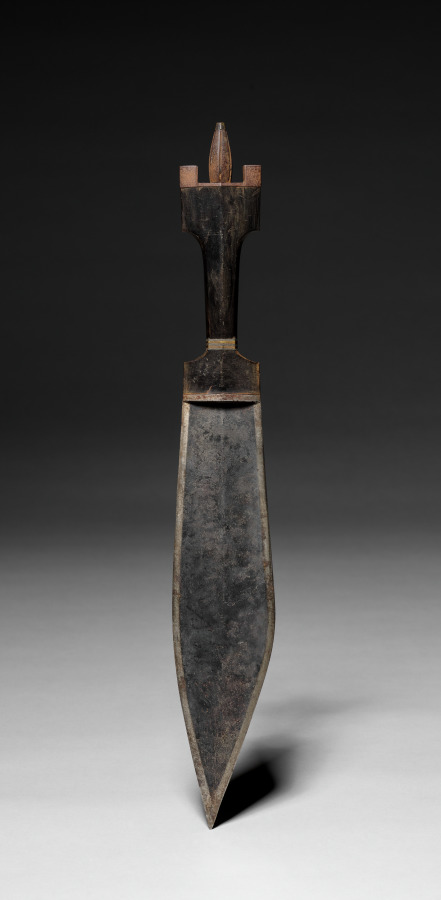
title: Knife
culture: Africa, East Africa, Somalia, unknown maker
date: early 1900s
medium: Iron and horn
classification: Arms and Armor